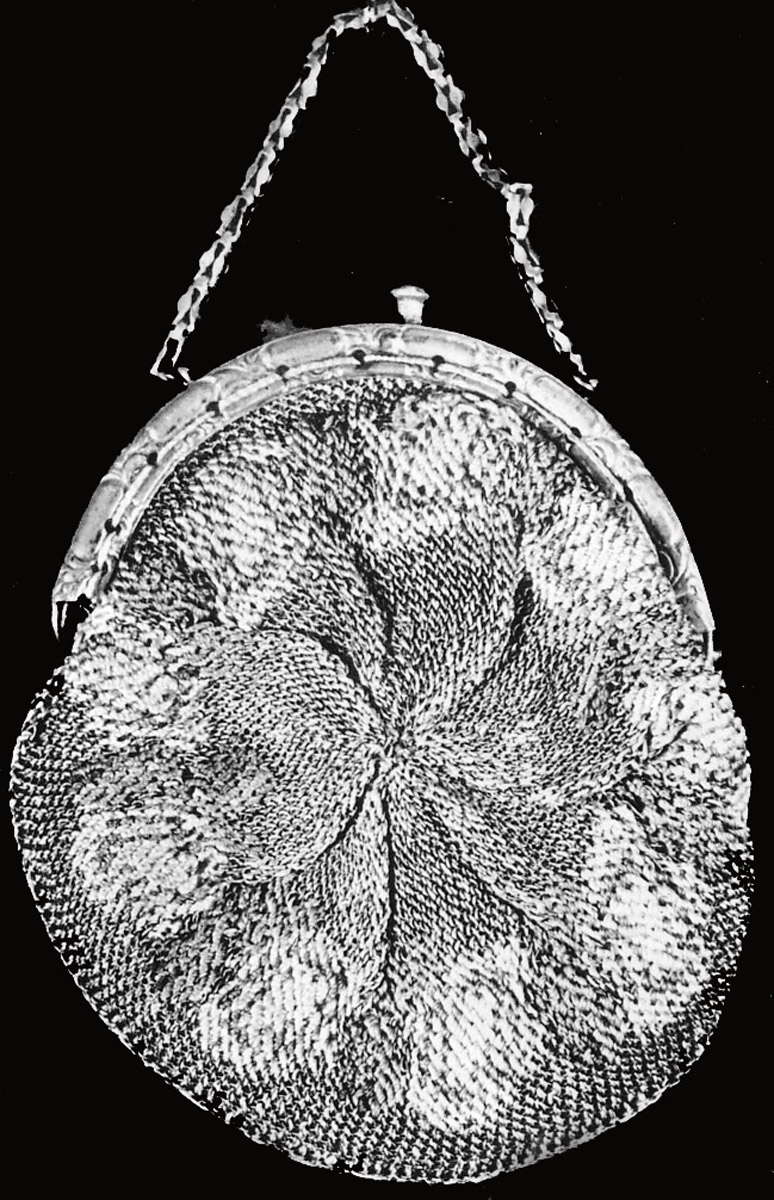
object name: Costume and Accessories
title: Purse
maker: France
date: 19th century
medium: Knitted of metal thread made with metal strip wrapped on a silk core. Embroidered in silk in tent stitch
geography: France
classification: textile; needlework (visual works); costume; dress (garment); clothing